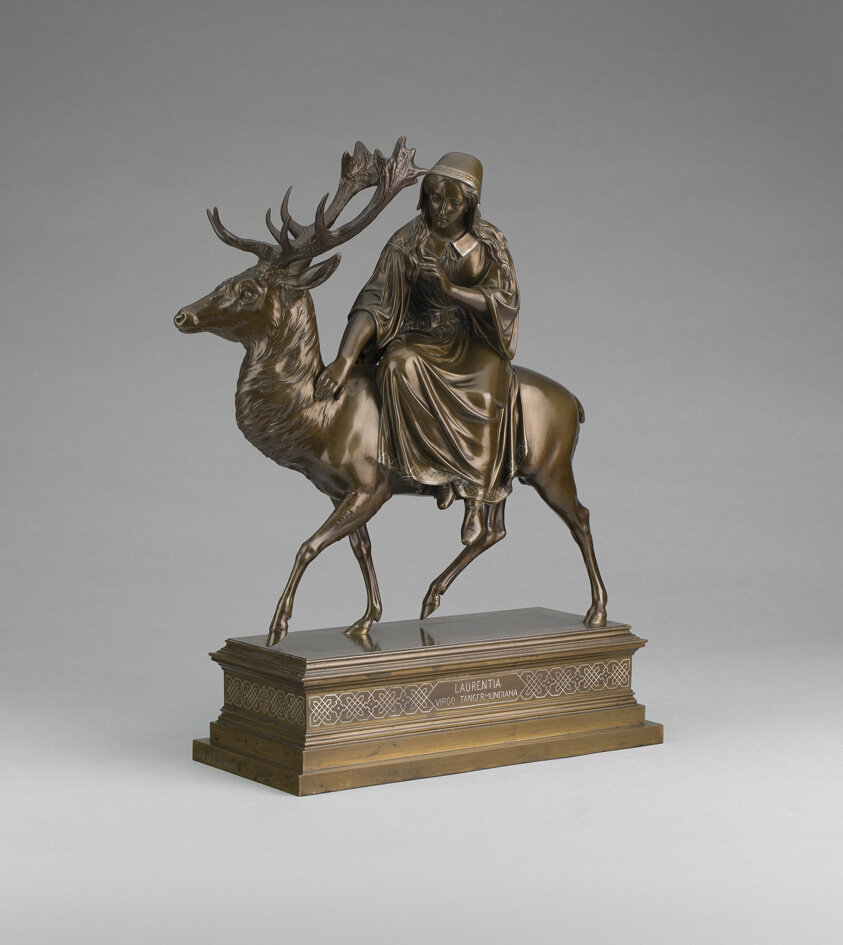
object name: Sculpture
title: Jungfer Lorenzen of Tangermünde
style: nineteenth century, 19th century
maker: Christian Daniel Rauch (German, 1777–1857)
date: After 1837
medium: Bronze inlaid with silver and rubies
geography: Germany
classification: sculpture; bronze; german; figure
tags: girl, animals, Germany, mythology, youth